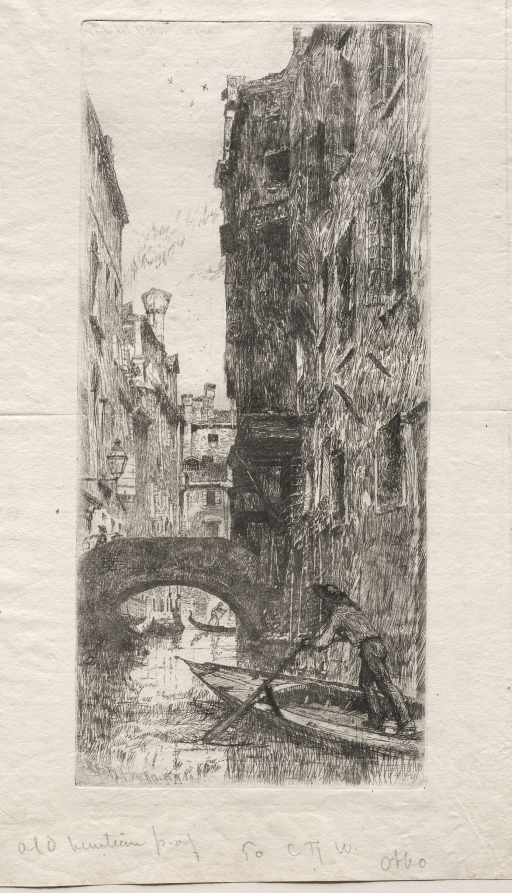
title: Ponte del Pistor, Venice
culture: America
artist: Otto H. Bacher (American, 1856–1909)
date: 1880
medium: etching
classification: Print